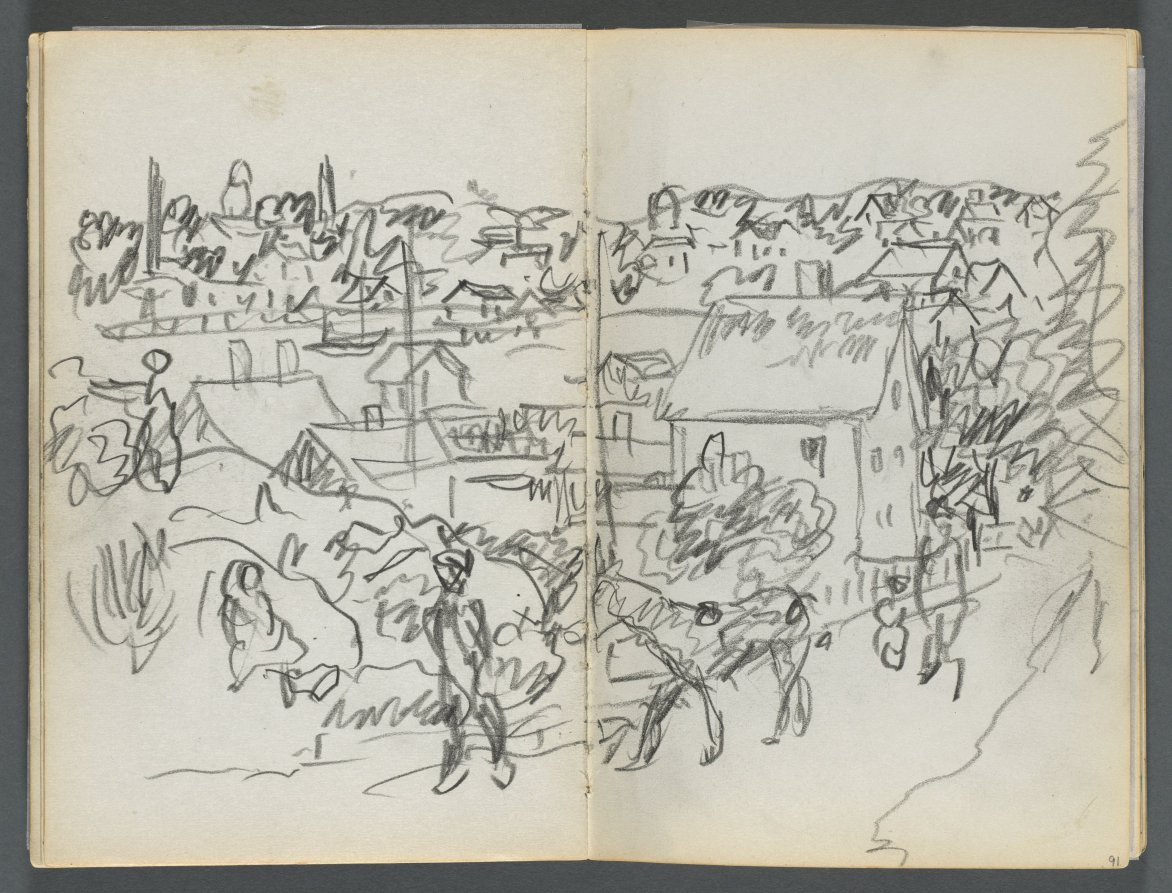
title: Sketchbook, The Dells, N° 127, page 090 & 91: Harbor with a Road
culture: America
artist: Maurice Prendergast (American, born Newfoundland [now Canada], 1858–1924)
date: c. 1919–1921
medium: graphite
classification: Bound Volume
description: This sketchbook contains 59 pages of graphite drawings and 16 watercolors made at various locations on Cape Ann, Massachusetts.